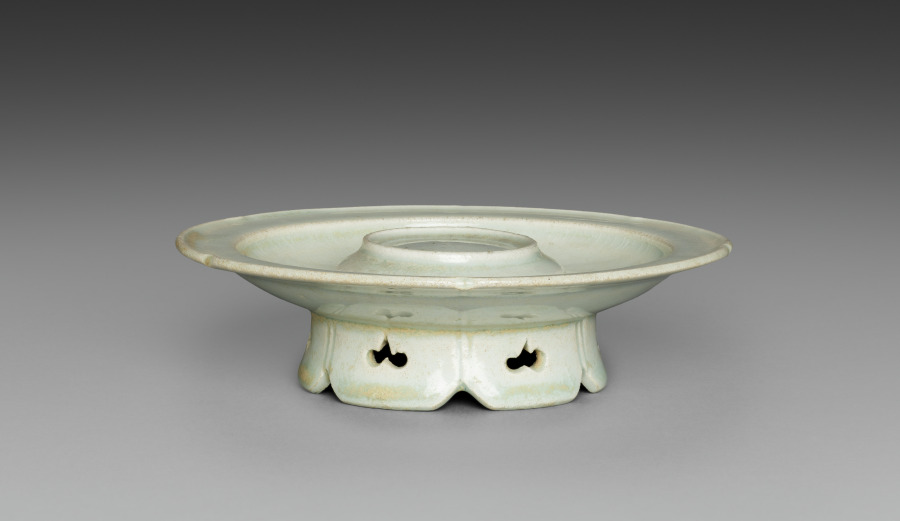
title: Cup and Stand (stand)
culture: China, Southern Song dynasty (1127-1279)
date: 1100s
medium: glazed porcelain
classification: Ceramic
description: The kilns of Jingdezhen in Jiangxi province produced an extremely delicate porcelain made from the local resources of kaolin (white China clay) and petuntse (a feldspathic rock called china stone). It is glazed with a clear bluish-white glaze, thus the name qingbai (blue-white) or yingqing (shadowy blue) for this type of ware.